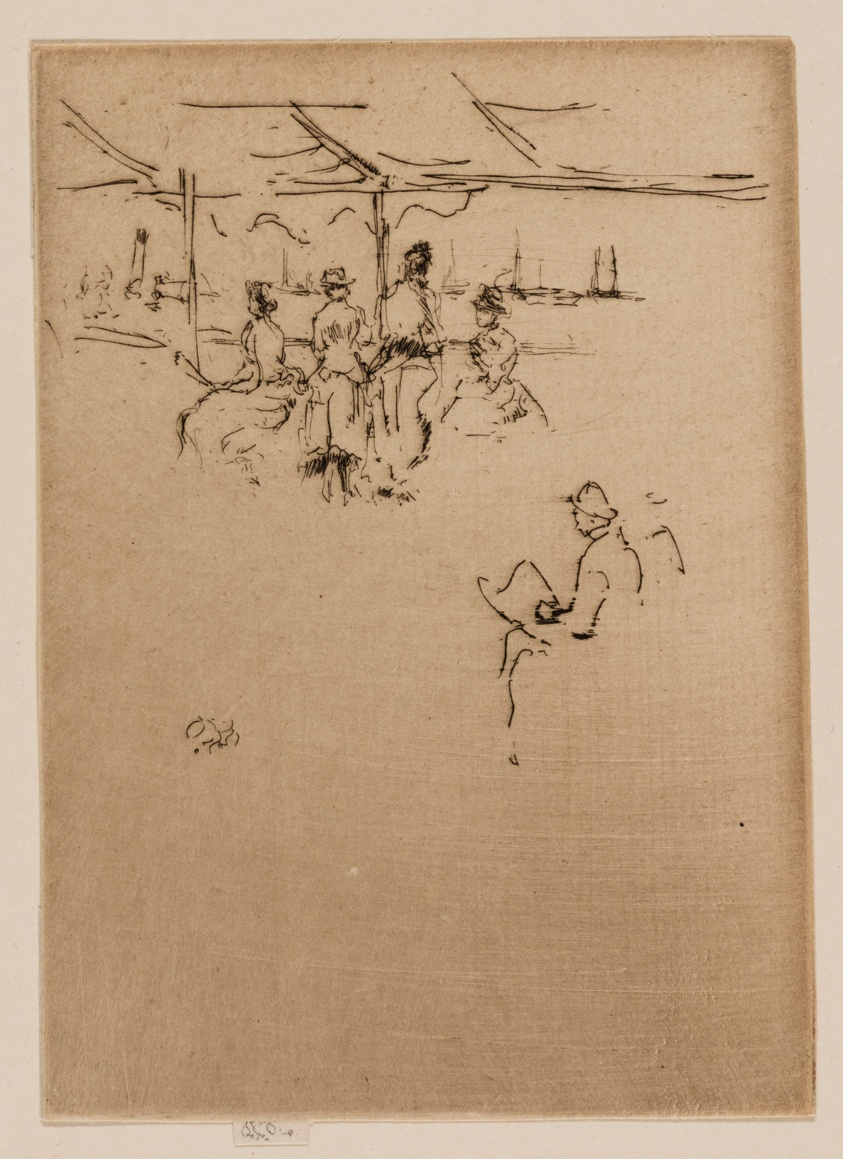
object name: Print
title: The Landing Stage, Cowes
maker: James McNeill Whistler (American, 1834-1903)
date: 1887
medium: Etching in black ink on ivory laid paper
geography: United States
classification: etching; print; prints and drawing; paper